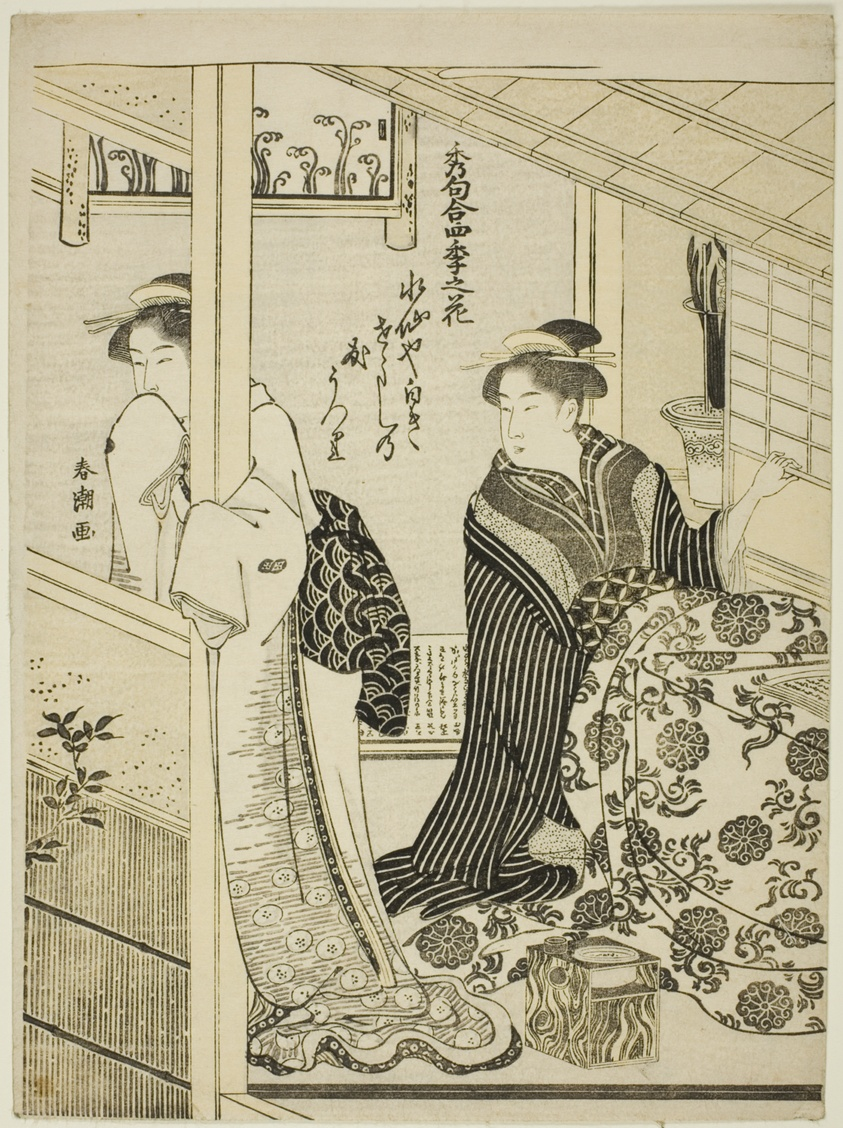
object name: Print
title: Narcissus in Winter, from the series "Choicest Odes upon Flowers of the Four Seasons (Shuku awase, shiki no hana)"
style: Japanese (culture or style)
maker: Katsukawa Shuncho; Japanese, active c. 1780-1801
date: c. 1792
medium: Color woodblock print; chuban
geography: Japan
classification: woodblock print; print; asian art